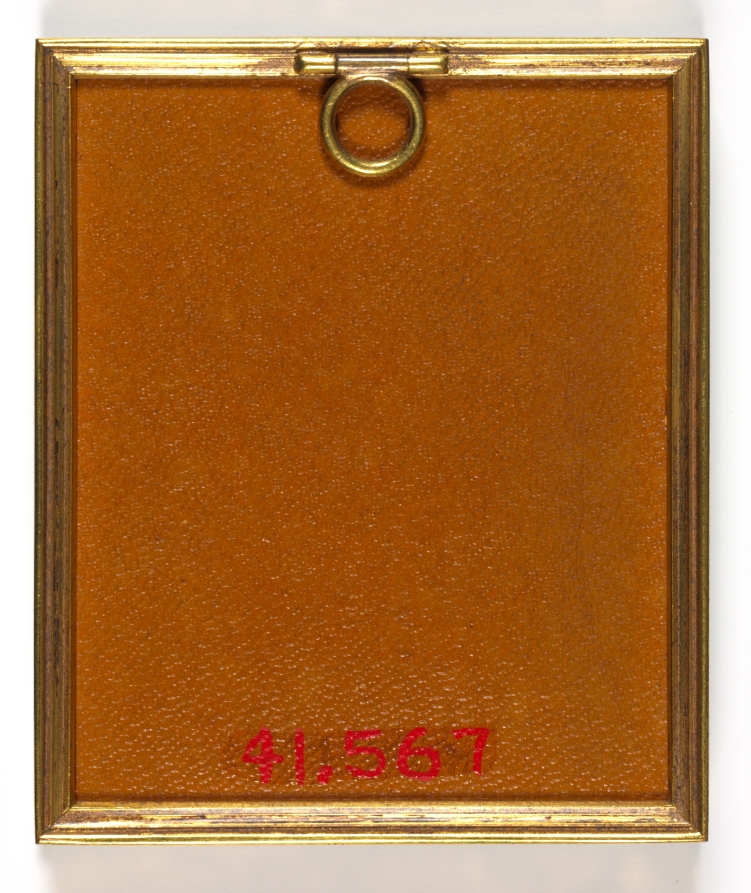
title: Portrait of Sukey, Lady Oglander, née Serle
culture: England, 18th century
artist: John I Smart (British, 1741–1811)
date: c. 1770s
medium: graphite and wash on laid paper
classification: Portrait Miniature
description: Although it is impossible to say if it was always part of the artist’s process to execute a preparatory sketch prior to painting each miniature, we do know that John Smart retained many hundreds of these sketches. A group of preparatory sketches—of which this portrait is one—descended through the Smirke family after Smart’s daughter Sarah gave a sketchbook containing preparatory portrait studies to her friend Mary Smirke, sister of the celebrated Victorian architect Sydney Smirke. This book was probably broken up around 1877 when it was divided between Sydney’s daughters Mary Jemmett and Mrs. Lange, whose portions were both sold at auction in 1928. G. C. Williamson was the first to suggest that Smart’s sketches were well known and that they were preparatory studies for the painted miniatures. Williamson listed the names of sitters from the sketches known to him at the time, and they include Lady Oglander. This portrait was assigned the historically colorful but fictitious title of “Duchess of Bourbon” at some point after memory of its true identity had been lost. Giving illustrious titles to portraits of unknown sitters was a popular strategy adopted by dealers during the nineteenth and twentieth centuries, often applied to miniature portraits and, in particular, to Smart’s sketches of women. However, when the paper backing was removed from this miniature, the name Lady Oglander was discovered written twice in graphite on the back. The lower inscription seems to have been reinforced or written later and is probably not in the artist’s hand. Compared to his contemporaries George Engleheart (1752–1829) and Andrew Plimer (1763–1837), whose female sitters were often painted in similar simple white gowns, Smart often lavished more attention on the costumes in his portraits of women, whose dresses incorporated colored silks, printed fabrics, and luxury trimmings like lace and fur, as seen here. The sitter’s head and shoulders face right, and her light hair is dressed high, with flat curls at the back of her head. She has gray eyes and wears a lavender surcoat trimmed with ermine, over a turquoise blue, low-necked dress and white underslip bordered with lace; the ermine trim confirms that the sitter was a titled lady. Smart placed her inside a faintly suggested oval, and the background is unpainted. Sukey, Lady Oglander (née Serle, d. 1805), married Sir William Oglander, 5th Baronet of Nunwell (1733–1806), in 1765. She was the only daughter of Peter Serle of Testwood, Hants, and delighted the Oglander family by bringing £10,000 to the marriage. Sukey had eleven children with William, eight of whom survived childhood. The Oglanders were a prominent and well-loved family on the Isle of Wight, their presence on the island first dating from the time of William the Conqueror and lasting until the title expired in 1874 when the last Oglander Baronet of Nunwell died. This preparatory sketch somewhat resembles a miniature on ivory of the same size that sold at Christie’s, London, in 2000. The sitter’s name is unknown, but she wears a nearly identical green wrap gown and underslip and a lavender surcoat, though it is trimmed with brown fur rather than ermine. Her coiffure is similar to that in the preparatory sketch as well, though in the ivory her hair is ornamented with pearls. The facial features, however, differ, with the sketch representing an older woman having somewhat coarser features. While the portrait may have been idealized in the finished ivory version, it is also possible that the sketch was employed primarily for the costume and depicts another sitter entirely. Daphne Foskett lists among Smart’s work portraits of a Dr. John Oglander and a Lady and Miss Oglander. A preparatory sketch by Smart of a Mr. Oglander sold at Christie’s, London, on June 10, 2010. Another preparatory sketch titled Portrait of John Oglander, Warden of New College, Oxford, was sold at Bonhams, London, on October 30, 2001. These sketches are approximately the same size as Cleveland’s Lady Oglander and may have been commissions related by date or patron. The sale of Smart drawings inherited by W. H. Bose and sold at Christie’s, London, in 1937 included a “Head of Miss Oglander,” “sister to Sir John Oglander of the Isle of Wight,” but this lot was not illustrated, and its relationship to the sketch discussed here is unknown. John Oglander, Warden of New College, Oxford, was the brother-in-law of Sukey, Lady Oglander, and Miss Oglander was probably her sister-in-law Susannah Oglander (d. 1816).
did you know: Sketches helped John Smart work out the particulars of a portrait before commencing the miniature on ivory, and they were useful in the event that a duplicate might later be required.